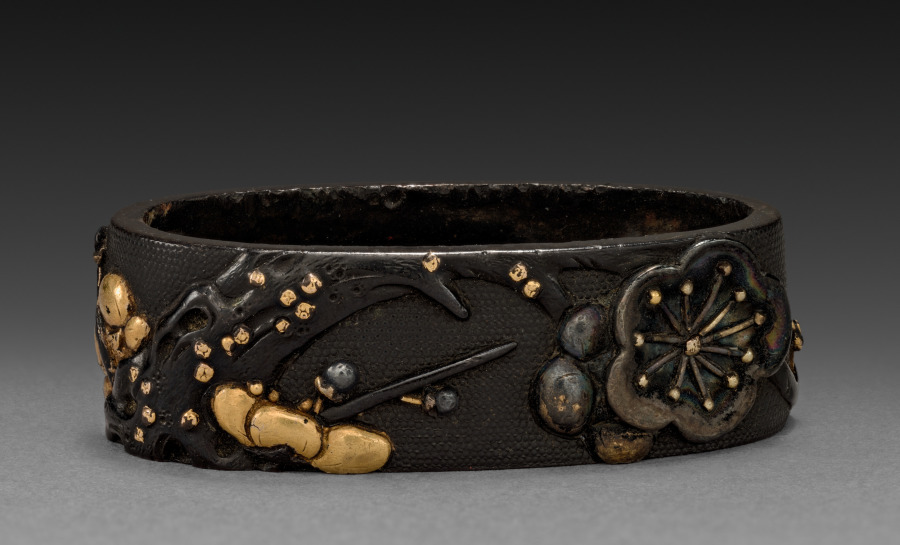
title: Sword-Hilt Collar (Fuchi)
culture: Japan, Edo period (1615–1868)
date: 1700–1850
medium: shakudo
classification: Arms and Armor